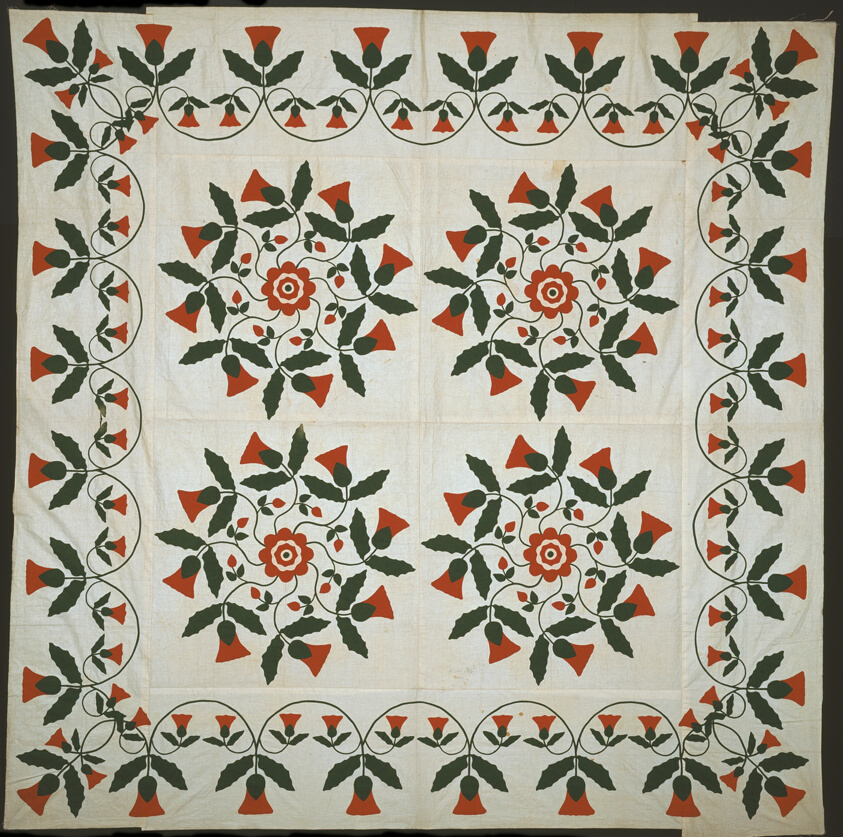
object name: Textile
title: Bedcover (Quilt Top)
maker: Susan (née Mumma) Major (1843-1926); United States, Pennsylvania, Dauphin County, probably Harrisburg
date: 1850 or later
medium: Cotton, plain weave; appliquéd with pieced plain weave; and plain weave; roller printed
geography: Pennsylvania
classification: needlework - quilt; textile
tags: floral motifs, foliage, flowers